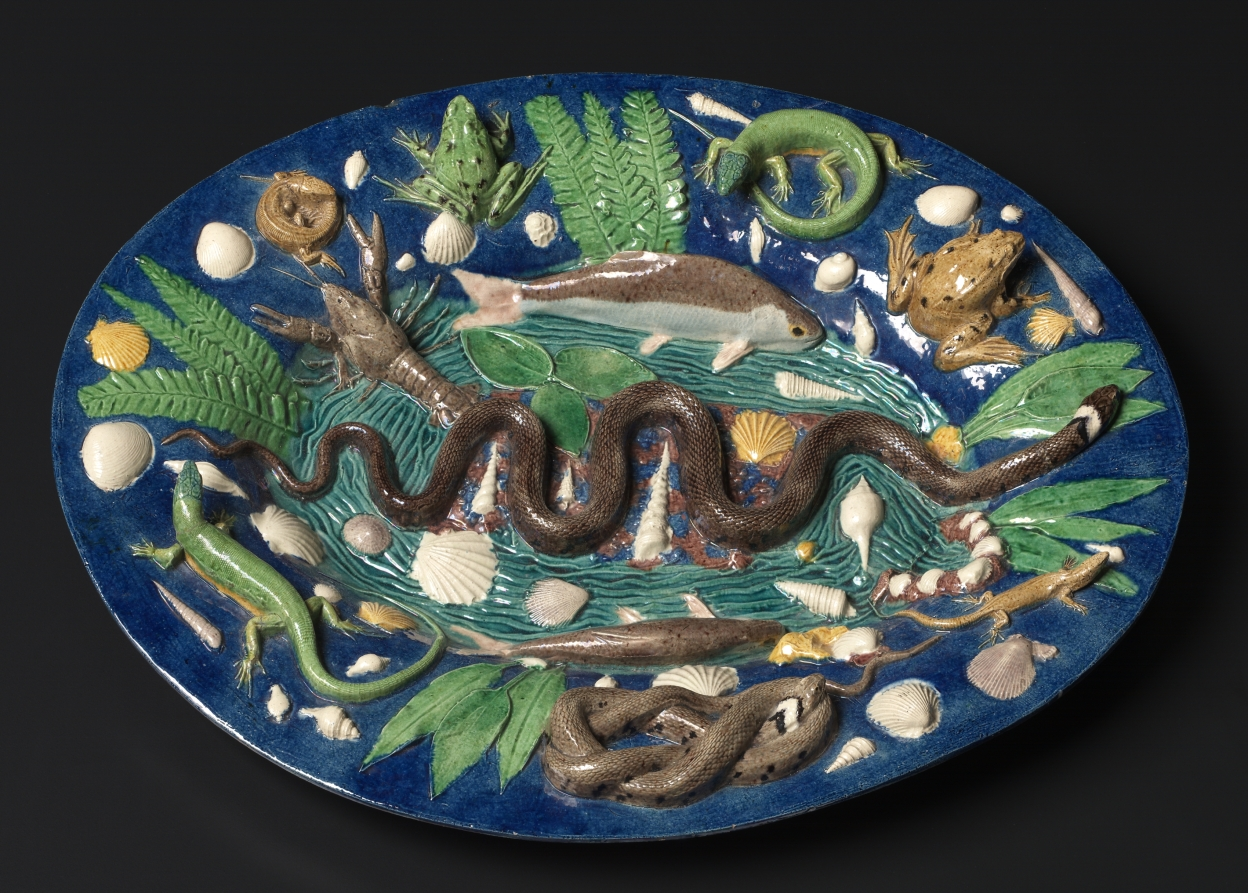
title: Platter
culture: France, 16th century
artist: circle of Bernard Palissy (French, 1510–1589)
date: late 1500s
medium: lead-glazed earthenware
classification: Ceramic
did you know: Coiled snakes, slinking lizards, and scaly fish adorn this decorative platter. Some of the naturalistic details were formed using casts of real animals.